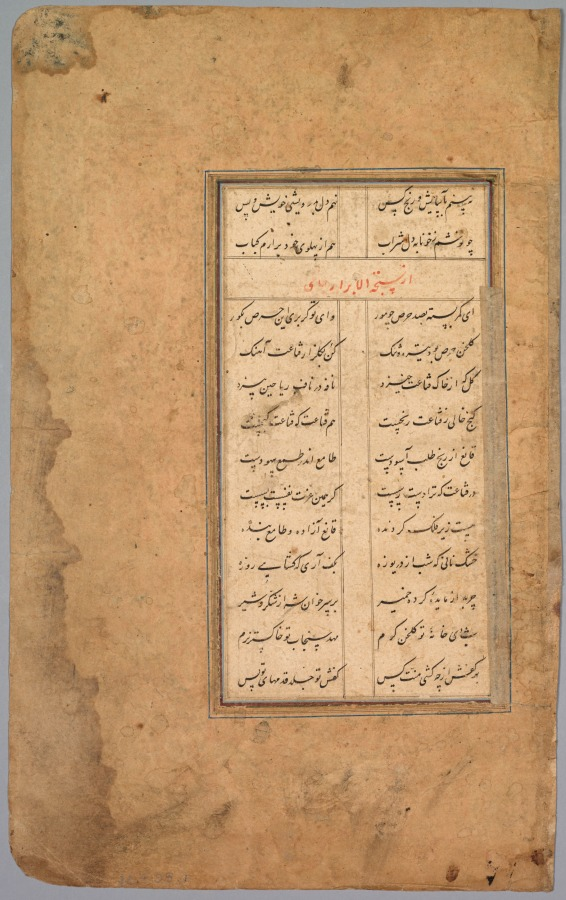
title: School Exercise Alphabet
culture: India, Mughal Dynasty (1526-1756)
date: 18th century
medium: ink on paper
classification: Manuscript